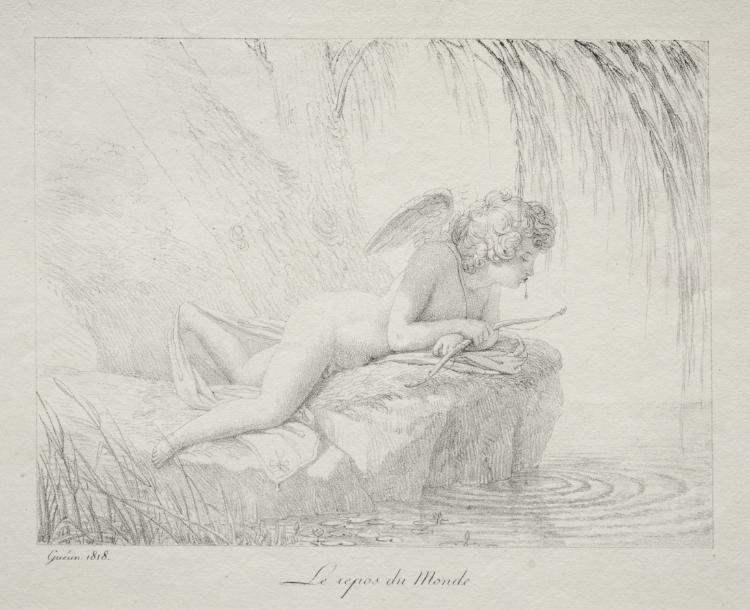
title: Repose of the World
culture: France, 19th century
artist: Pierre Guérin (French, 1774–1833)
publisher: Godefroy Engelmann (French, 1788–1839)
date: 1818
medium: lithograph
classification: Print